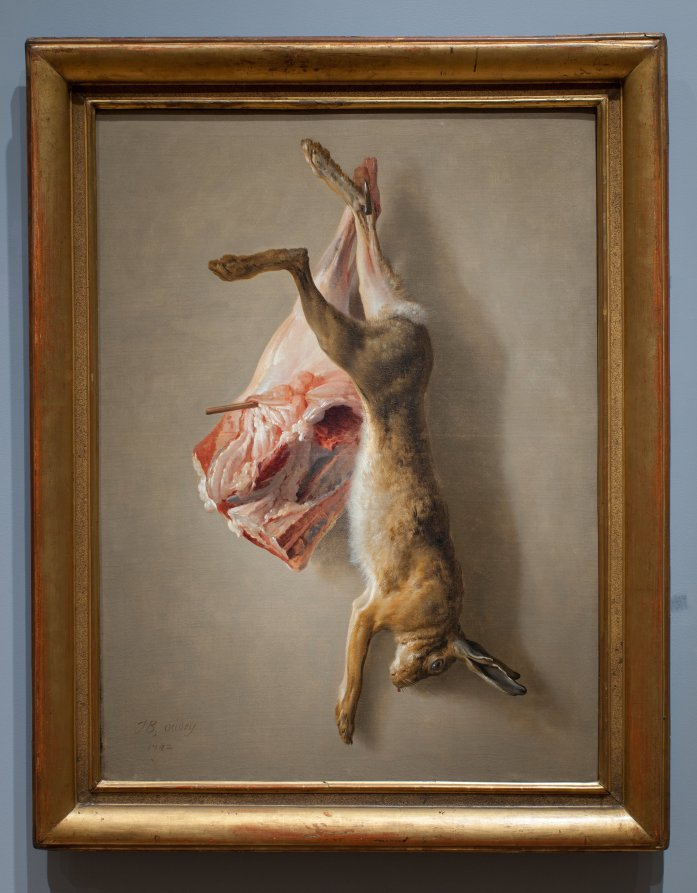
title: A Hare and a Leg of Lamb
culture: France, 18th century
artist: Jean-Baptiste Oudry (French, 1686–1755)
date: 1742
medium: oil on canvas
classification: Painting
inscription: signed lower left: J.B. Oudry / 1742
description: Oudry used a starkly simple composition and sterile background to emphasize his virtuosity in depicting textures, a highly desirable skill of still-life painters at this time. These artists were aiming for the highest level of accuracy—an effect of the Enlightenment, the contemporary intellectual movement that emphasized scientific reasoning in all pursuits. These paintings were generally displayed in hunting lodges or dining rooms, as a glorification of the hunt and the bounty it brings.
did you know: This lavish display of game was painted one year after a devastating famine gripped France.